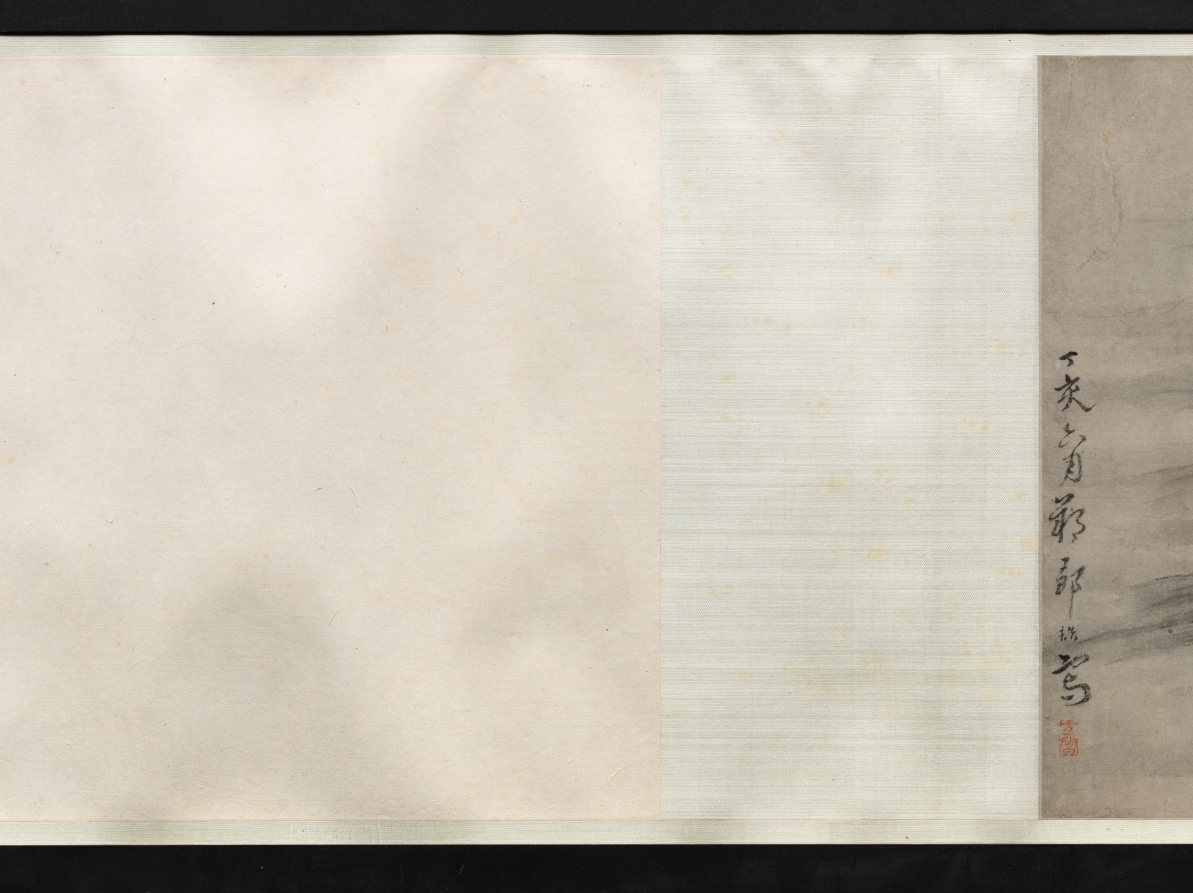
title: Autumn Mist in the Countryside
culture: China, Qing dynasty (1644-1911)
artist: Zou Zhe (Chinese, c. 1610-before 1688)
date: 1647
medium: handscroll, ink and color on paper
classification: Painting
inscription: Artist's inscription, signature, and seal: The first day of the sixth lunar month, the ting-hai year [1647], Tsou Che painted [this]. [seal] Fang-lu.